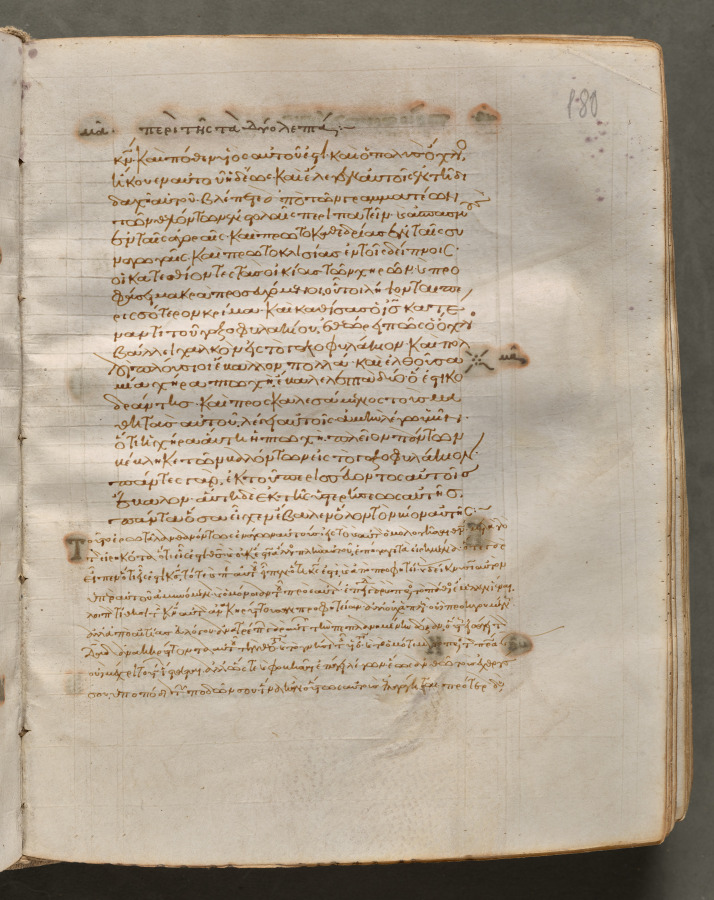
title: Text, folio 180 (recto), from a Gospel Book with Commentaries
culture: Byzantium, Constantinople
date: c. 1000–1100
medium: ink, tempera, and gold on vellum; leather binding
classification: Bound Volume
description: Each of the four gospels in this book opens on a page with brilliantly illuminated borders depicting the author of the text as well as birds-principally peacocks, symbols of the immortality of the soul-and fountains, representing the fountain of life and the salvation of the soul. This volume consists of 428 leaves with texts in Greek. Its level of sophistication suggests that it was probably written and decorated in a monastery in Constantinople.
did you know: Gospel Books were carried in procession through Byzantine churches.